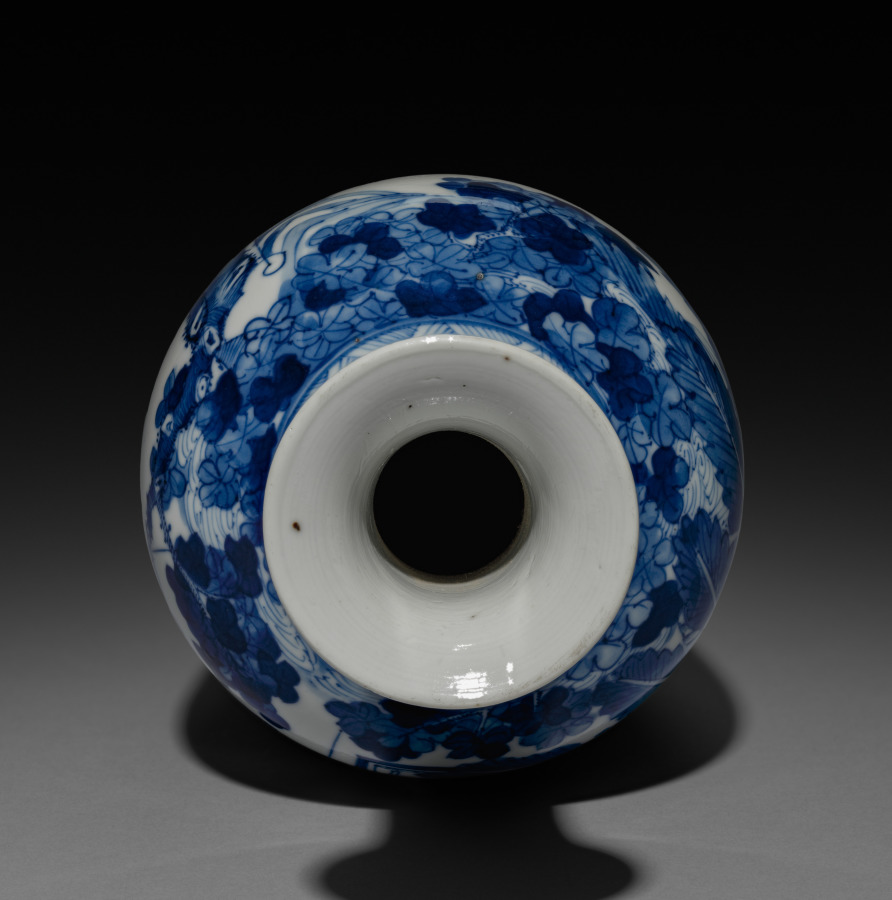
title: Vase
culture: China, Qing dynasty (1644-1911), Kangxi reign (1661-1722)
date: 1662–1722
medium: porcelain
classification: Ceramic